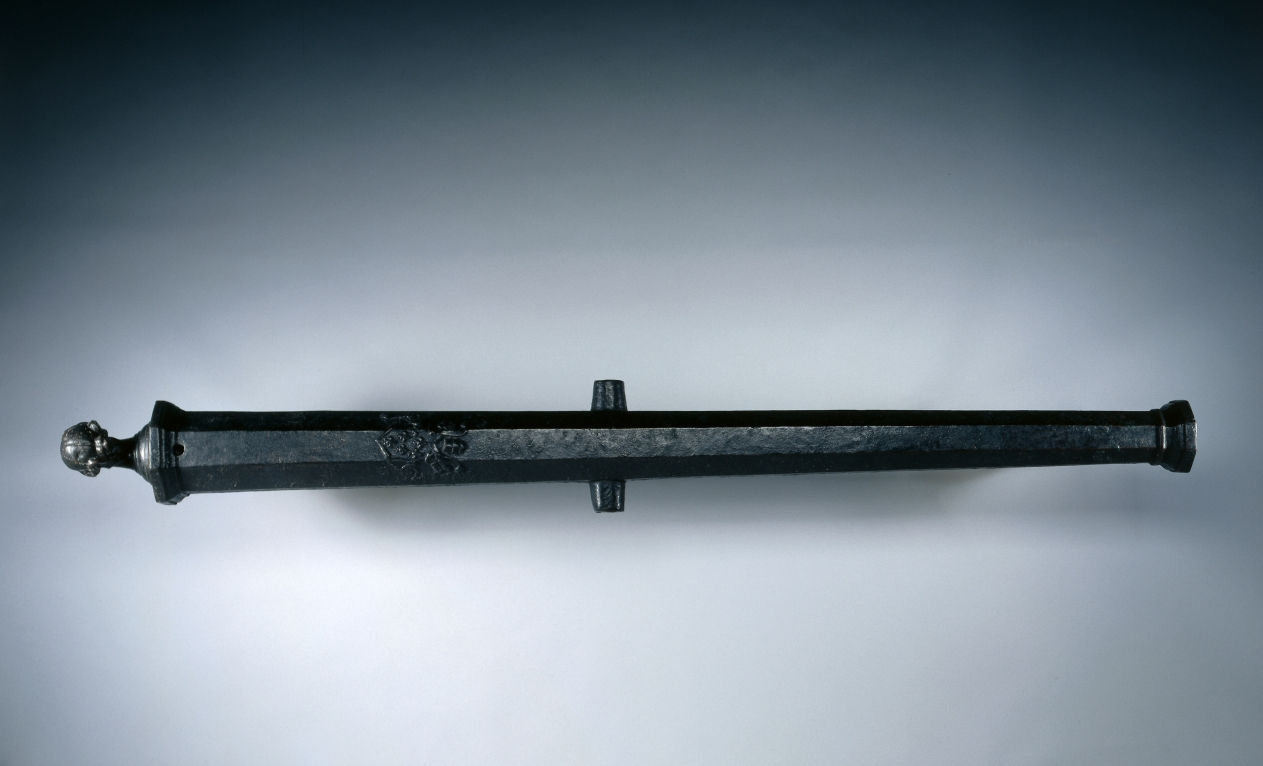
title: Falconet with Arms of Alessandro Farnese, Pope Paul III (1534-1549)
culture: Italy, 16th century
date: 1534–49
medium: bronze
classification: Arms and Armor